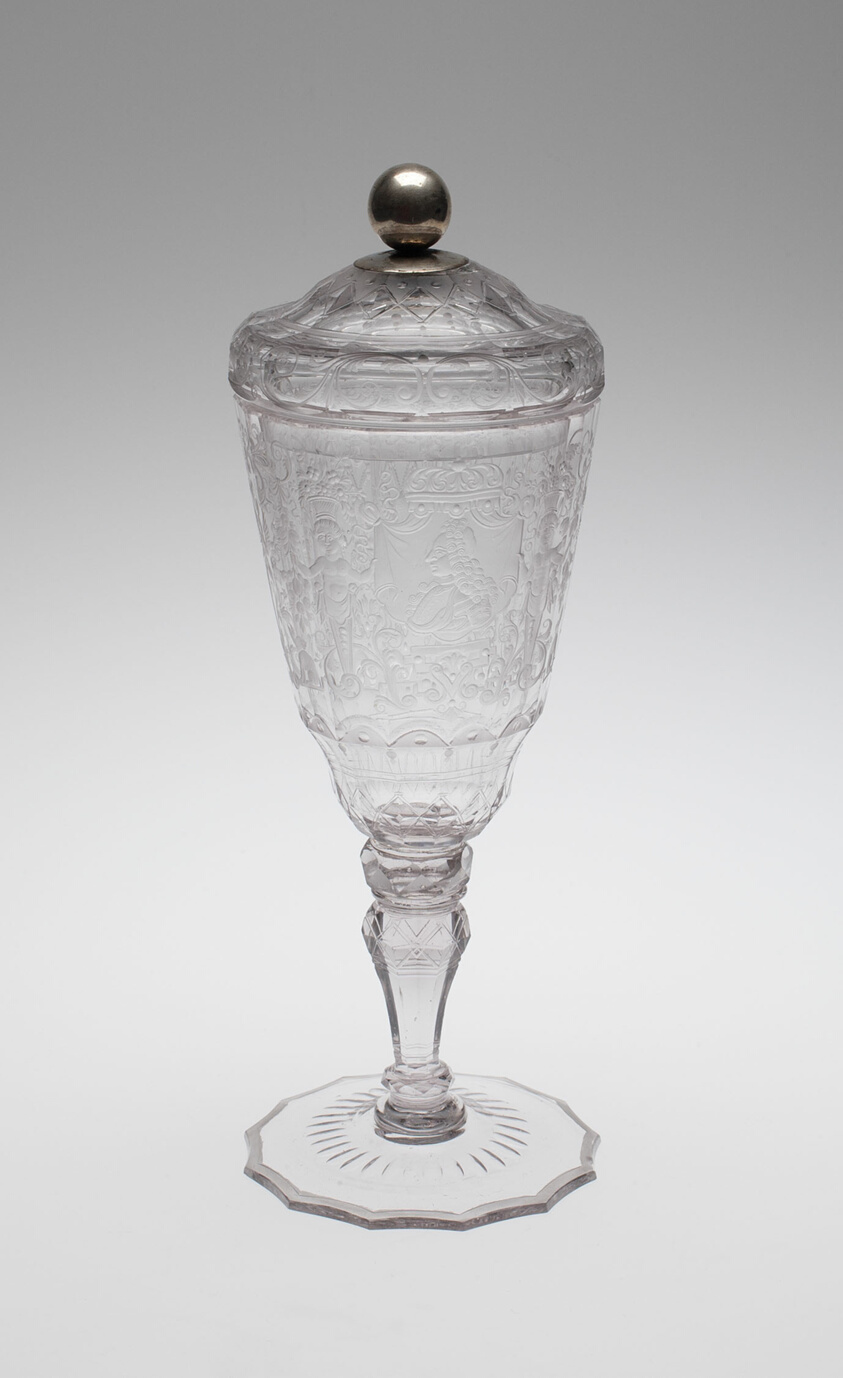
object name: Glass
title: Covered Goblet (Pokal)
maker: Germany, Schleswig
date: 1710/20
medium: Engraved glass, silver finial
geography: Germany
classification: drinking vessel; glass; european decorative arts